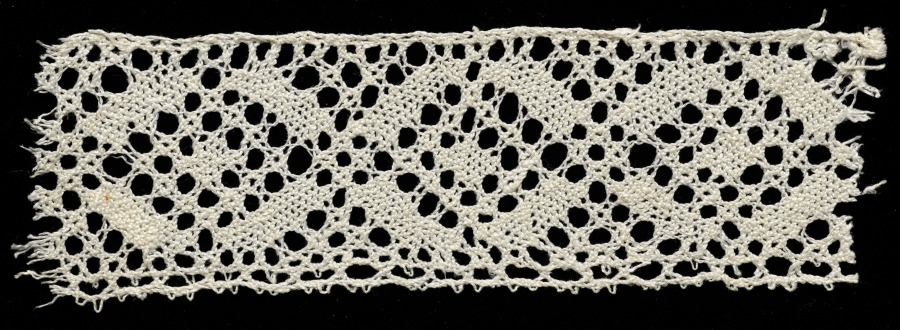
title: Lace Edging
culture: Spain, Huelva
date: 1600s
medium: Bobbin lace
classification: Lace